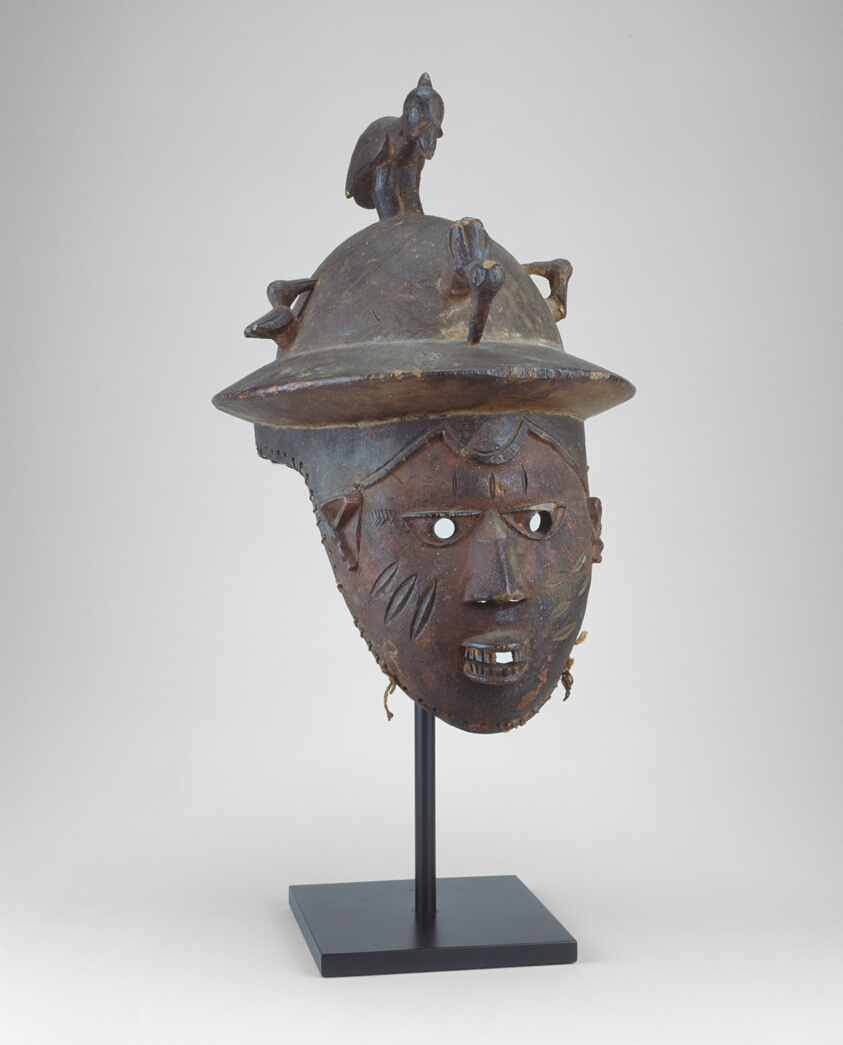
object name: Mask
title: Mask for Egungun (Ere Egungun)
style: yoruba, Arts of Africa, Coastal West Africa, african Art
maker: Yoruba; Iseyin, Nigeria; Coastal West Africa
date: Late 19th century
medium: Wood and pigment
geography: Nigeria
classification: masks; wood; arts of Africa; african art; ceremonial mask; headdress - misc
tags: masks